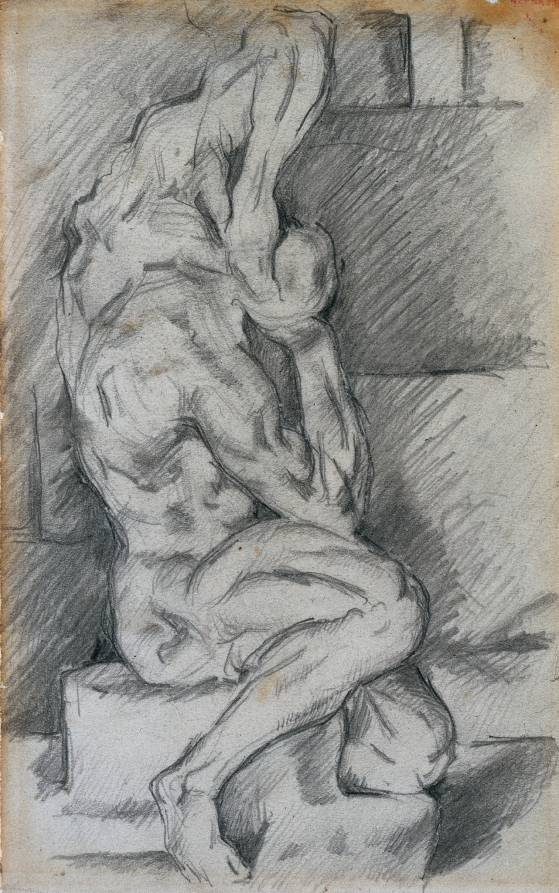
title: Sketch of Anatomical Sculpture (recto)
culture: France, 19th century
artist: Paul Cezanne (French, 1839–1906)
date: 1881/84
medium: graphite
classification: Drawing